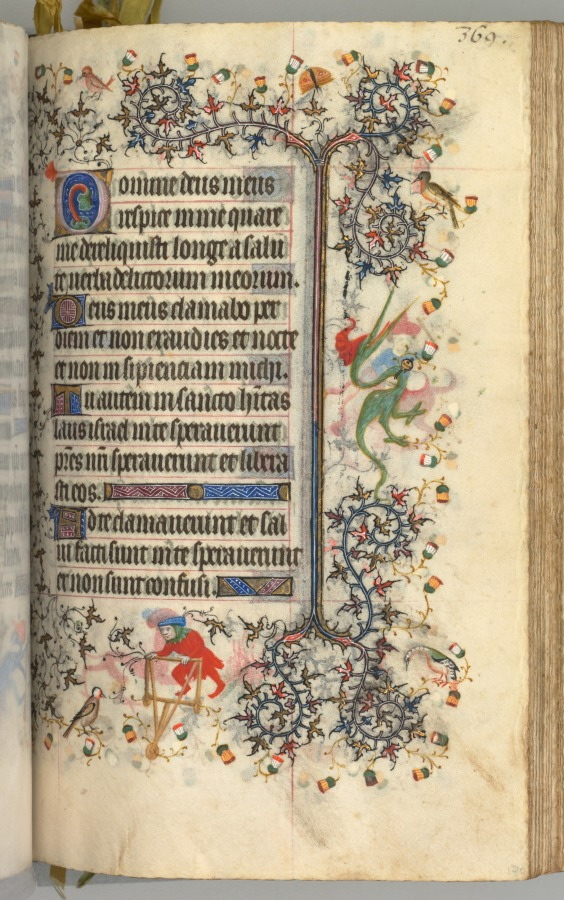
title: Hours of Charles the Noble, King of Navarre (1361-1425): fol. 180r, Text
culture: France, Paris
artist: Master of the Brussels Initials and Associates (French)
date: c. 1405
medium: ink, tempera, and gold on vellum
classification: Bound Volume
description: This precious volume was obviously highly prized by its owner, the French-born King of Navarre, who had his coat of arms painted on no less than twenty folios. Rather than directly commissioning this manuscript from a specific workshop, it seems that Charles the Noble acquired his book of hours -- perhaps ready-made for the luxury market -- while on a trip to Paris in 1404-05. A collaborative effort, six painting styles are evidenced within the pages of this codex, those of two Italians, two Frenchmen, and two Netherlanders. The painter who was responsible for the planning and decoration of the book, and who produced seventeen of the large miniatures, was a Bolognese artist known as the Master of the Brussels Initials. His principal assistant, responsible for most of the borders, was a Florentine who signed his name "Zecho" da Firenze on folio 208 verso.